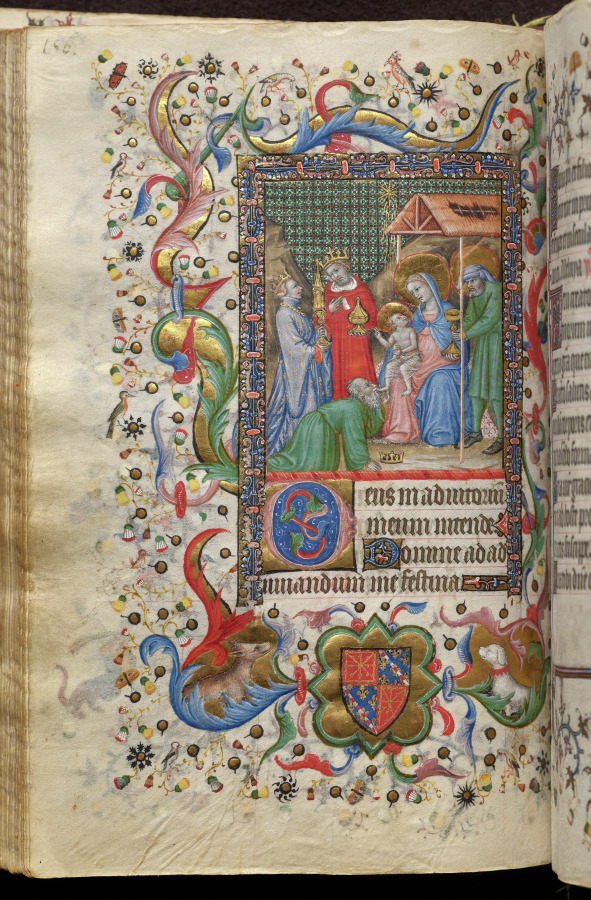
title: Hours of Charles the Noble, King of Navarre (1361-1425): fol. 78v, Adoration of the Magi (Sext)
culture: France, Paris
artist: Master of the Brussels Initials and Associates (French)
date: c. 1405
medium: ink, tempera, and gold on vellum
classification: Bound Volume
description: This precious volume was obviously highly prized by its owner, the French-born King of Navarre, who had his coat of arms painted on no less than twenty folios. Rather than directly commissioning this manuscript from a specific workshop, it seems that Charles the Noble acquired his book of hours -- perhaps ready-made for the luxury market -- while on a trip to Paris in 1404-05. A collaborative effort, six painting styles are evidenced within the pages of this codex, those of two Italians, two Frenchmen, and two Netherlanders. The painter who was responsible for the planning and decoration of the book, and who produced seventeen of the large miniatures, was a Bolognese artist known as the Master of the Brussels Initials. His principal assistant, responsible for most of the borders, was a Florentine who signed his name "Zecho" da Firenze on folio 208 verso.